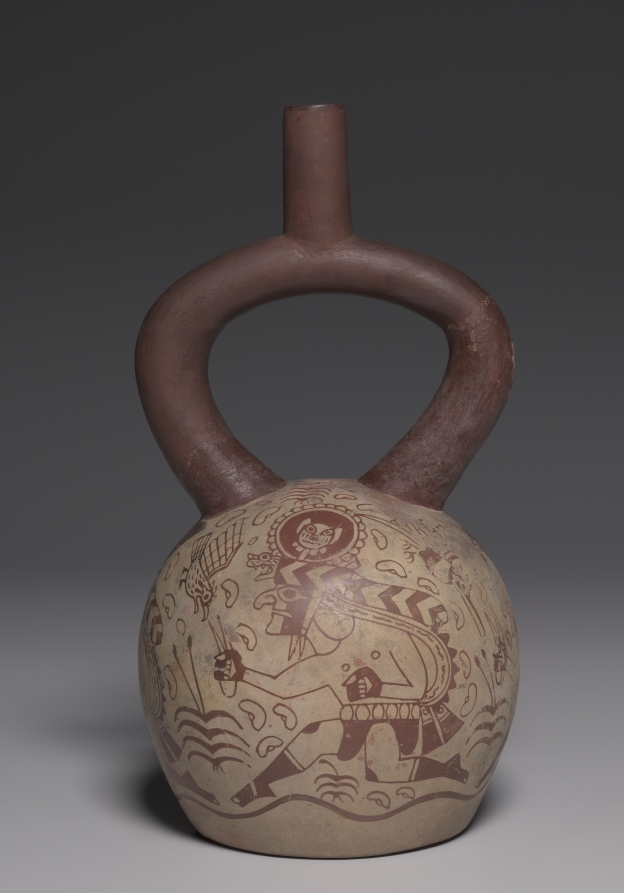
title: Vessel with Running Figures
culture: Peru, North Coast, Moche style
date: 450–550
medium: earthenware with colored slips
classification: Ceramic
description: Moche painters were masters at capturing the peak of physical activity. On this vessel are runners whose legs seem to churn so fast they ripple the desert groundline. Such runners, common in Moche art, always carry small bags, the contents open to question. But beans sometimes float around the runners, as here, suggesting they are involved in a ritual for planting. Beans also may have been used in rituals to divine the unknown.